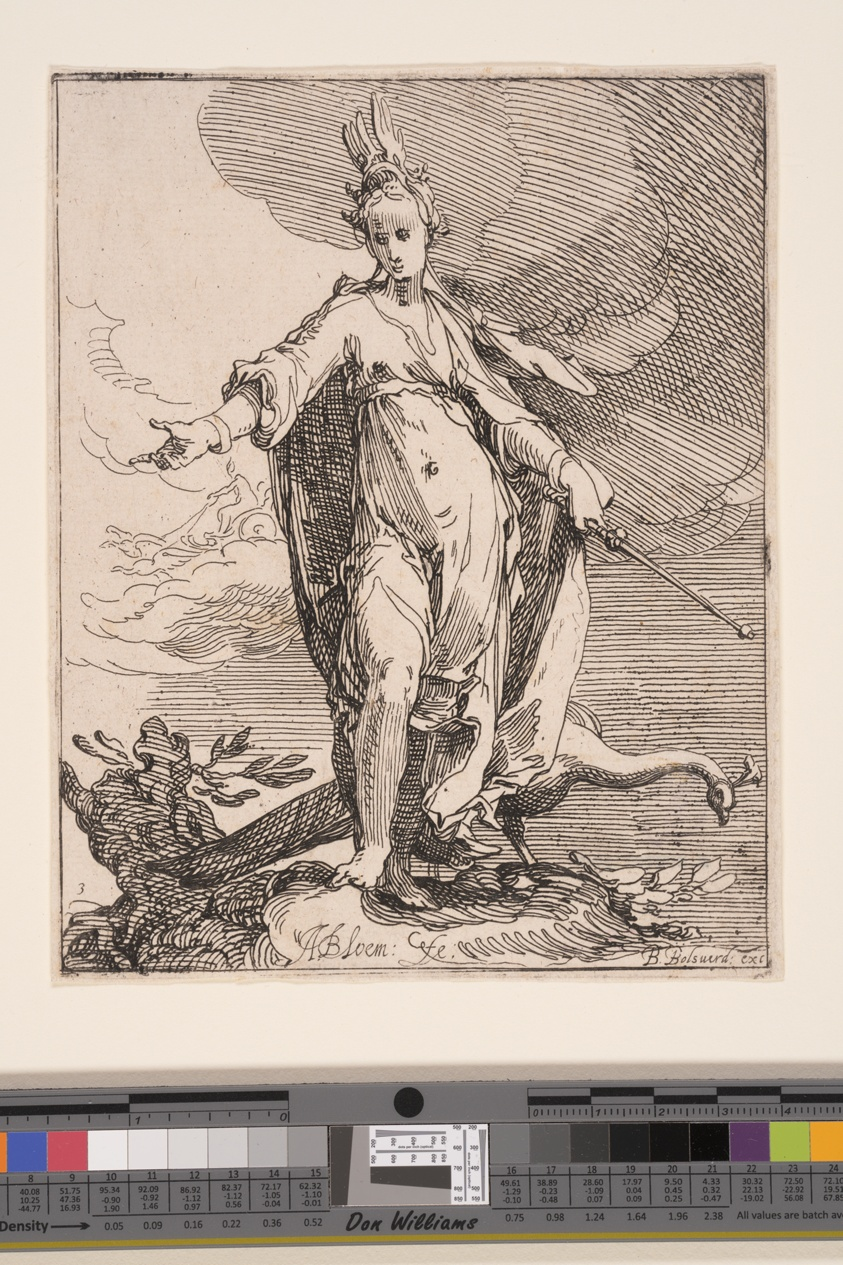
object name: Print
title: Juno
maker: Abraham Bloemaert (Dutch, 1566–1651)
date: c. 1610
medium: Etching on paper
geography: Netherlands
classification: etching; paper; print; prints and drawing